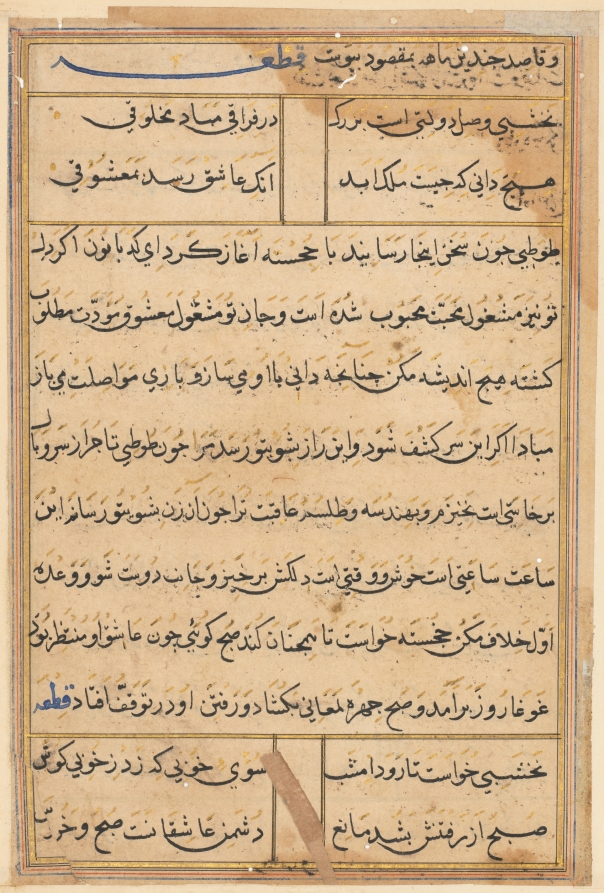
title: Page from Tales of a Parrot (Tuti-nama): text page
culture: Mughal India, court of Akbar (reigned 1556–1605)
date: c. 1560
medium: gum tempera, ink, and gold on paper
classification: Painting